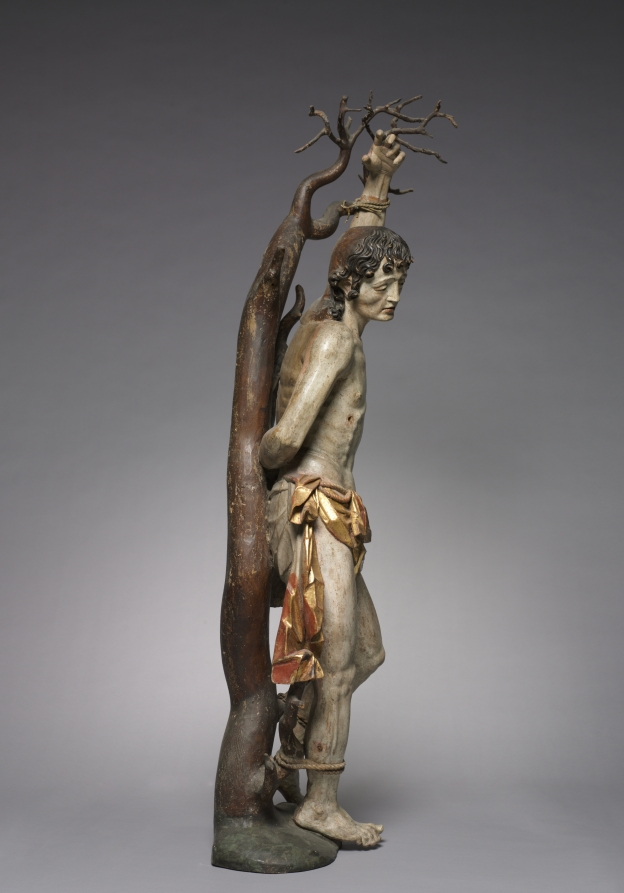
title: Saint Sebastian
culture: Germany, early 17th century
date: c. 1600–1620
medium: painted and gilded wood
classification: Sculpture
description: An early Christian saint and martyr, Sebastian was condemned to death by the Roman emperor Diocletian. Bound to a tree and shot with arrows, he survived—only later to be martyred by beating. This figure embodies the blend of stylistic influences that characterized German sculpture in the early 1600s. The graceful pose and anatomical naturalism of the legs indicate the influence of Italian Mannerism, while the crisp, stylized patterns of Sebastian’s hair and loincloth recall German Gothic works from the 1400s. The tree to which Sebastian is bound is an actual branch, shaped and refined to its present appearance.